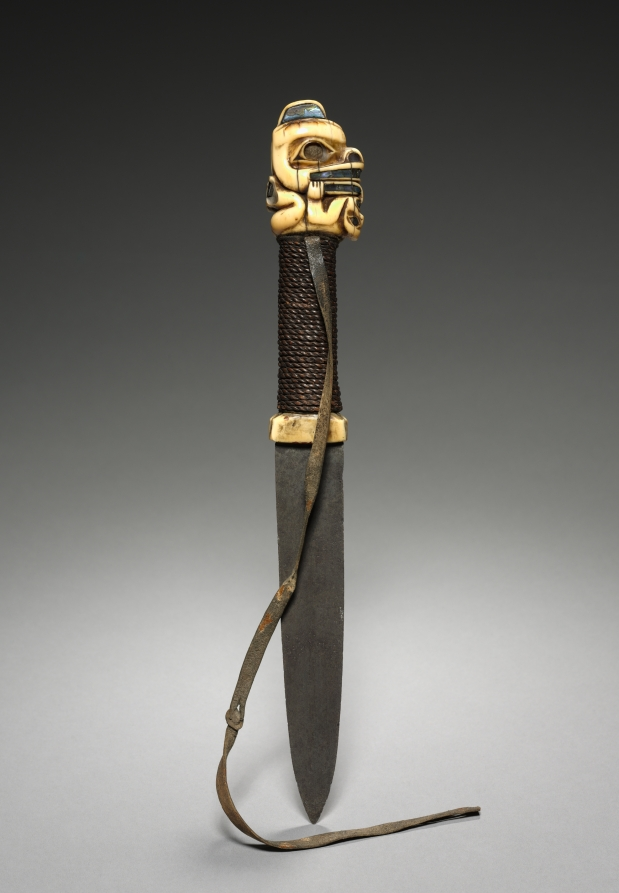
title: Dagger (Gwálaa)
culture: Native North America, Northwest Coast, Alaska, Tlingit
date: late 1800s–early 1900s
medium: ivory, fiber, leather, metal (steel), shell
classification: Arms and Armor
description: After Europeans introduced firearms, the Indigenous Northwest Coast dagger transformed from a weapon into a status symbol worn in a sheath that hung from the neck. That may be the case with this example, which depicts a bear’s head over a supine human.